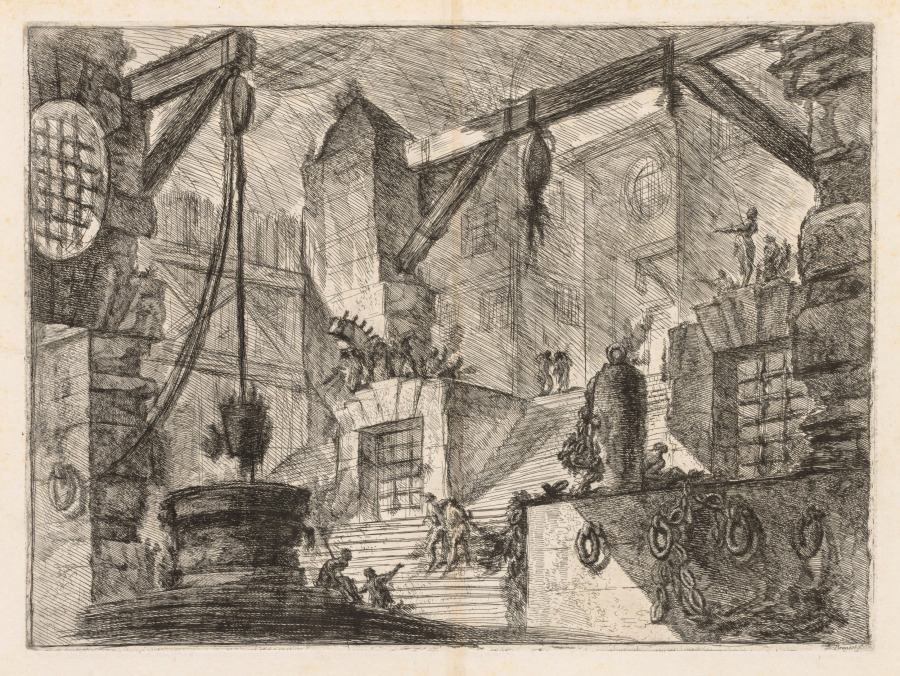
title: The Prisons: Colonnaded Interior with a Broad Stair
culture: Italy, 18th century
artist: Giovanni Battista Piranesi (Italian, 1720–1778)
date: 1745–1750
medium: etching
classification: Print